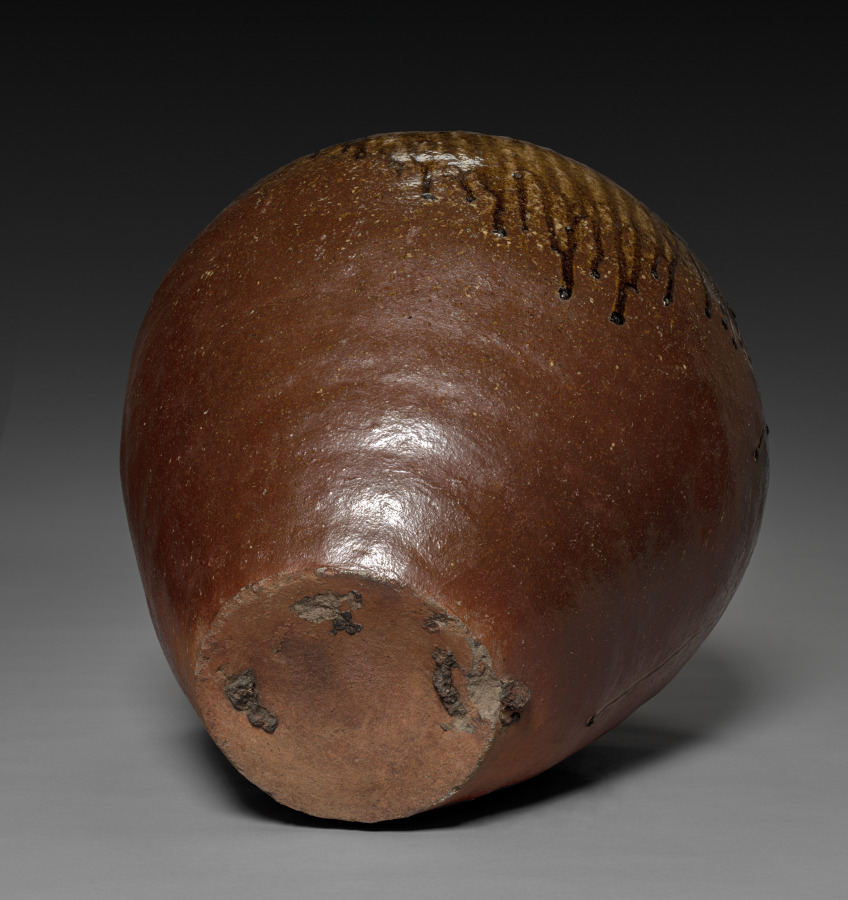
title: Storage Jar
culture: Japan, Muromachi period (1392–1573)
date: 1400s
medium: Stoneware with natural ash glaze (Echizen ware)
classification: Ceramic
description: Located in present-day Fukui prefecture northeast of Kyoto, the Echizen kilns produced ceramics with purplish-red skin flecked with white feldspar characteristic of the local clay used in this piece. Around 1700, the warm hue of Echizen wares gained popularity in tea practice, particularly when the vessels exhibited the rugged surface evident here in combination with the dynamic glossy glaze drips.